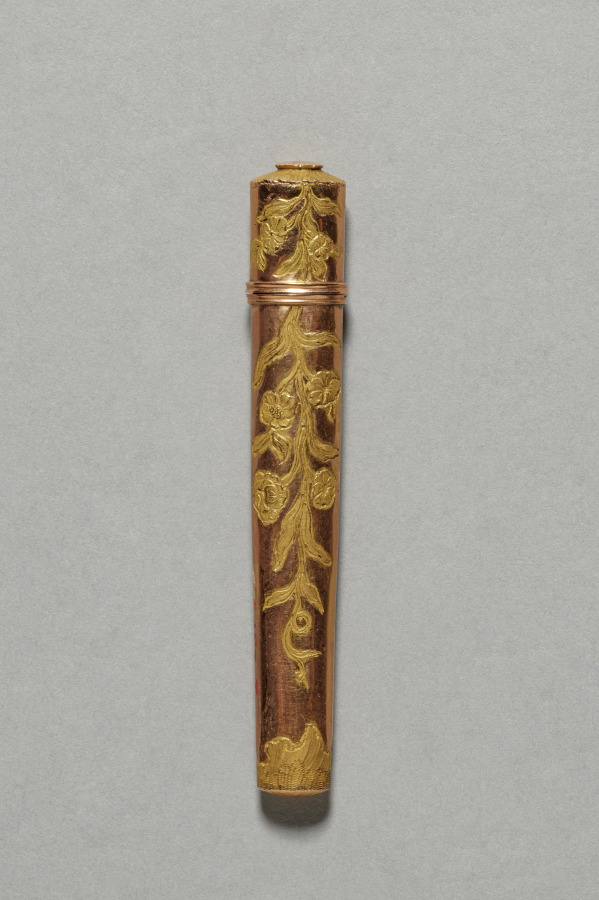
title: Needle Case from a Sewing Box (Nécessaire)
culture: Austria, possibly Vienna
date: c. 1765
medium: gold and mother-of-pearl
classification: Miscellaneous